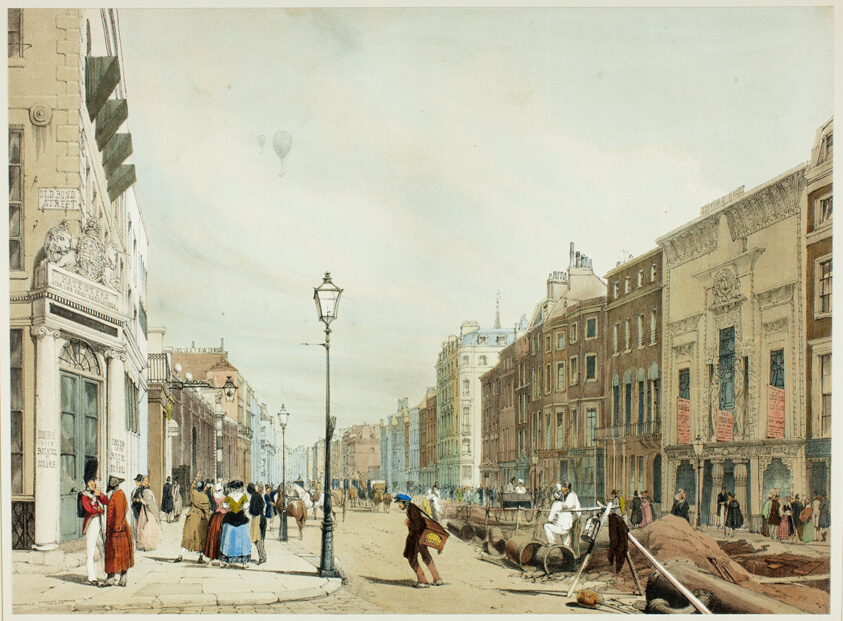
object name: Print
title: Piccadilly, Looking Towards the City, plate seventeen from Original Views of London as It Is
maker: Thomas Shotter Boys (English, 1803-1874); designed by Charles Ollier (English, 1788-1859)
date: 1842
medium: Hand-colored lithograph on paper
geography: England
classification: lithograph; print; prints and drawing